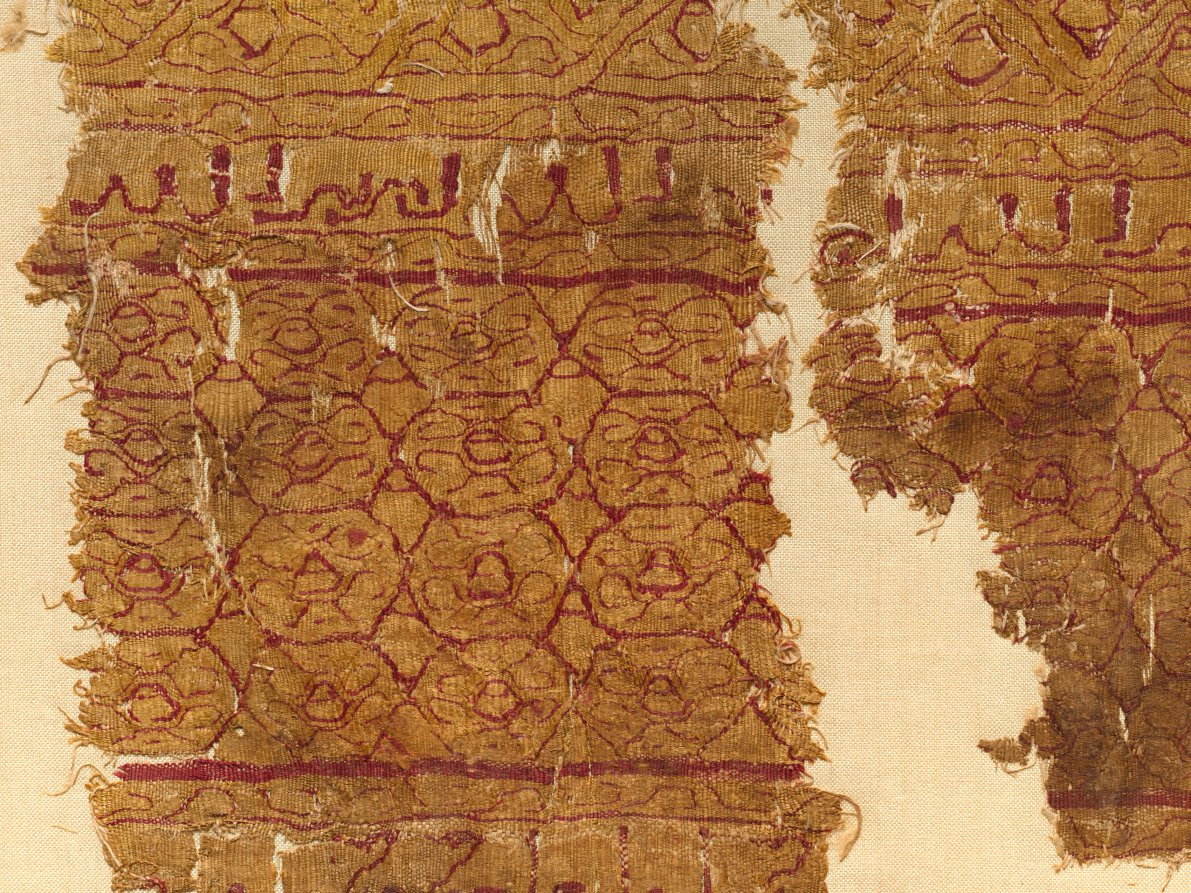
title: Tiraz with dense guilloche bands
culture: Egypt, Fatimid period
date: 1100s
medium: plain weave with inwoven tapestry weave: linen and silk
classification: Textile